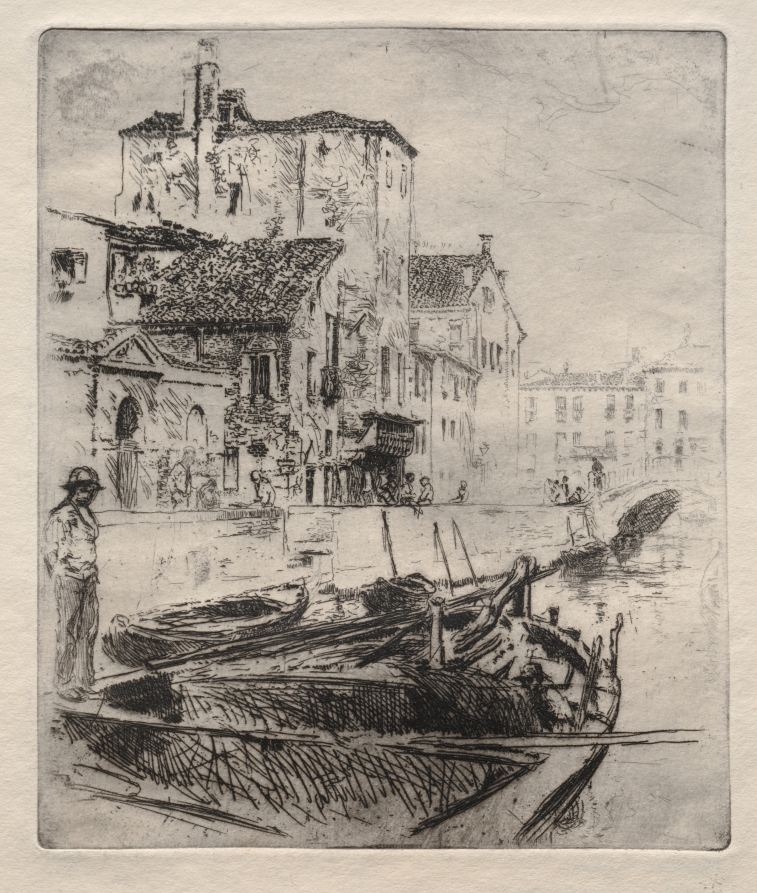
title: Venetian Canal and Boats, No. 8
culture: America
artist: Robert Frederick Blum (American, 1857–1903)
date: 1800s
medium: etching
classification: Print